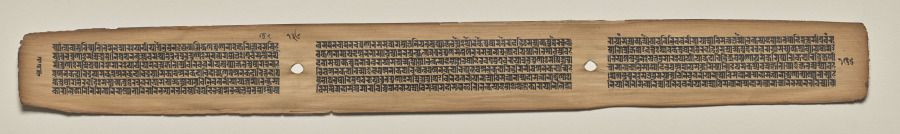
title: Text, Folio 136 (verso), from a Manuscript of the Perfection of Wisdom in Eight Thousand Lines (Ashtasahasrika Prajnaparamita-sutra)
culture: Eastern India, Bihar, Vikramashila Monastery. Painting: Nepal, Kathmandu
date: Sunday, September 14, 1119 (year 239 of the Newar Samvat in the month of Ashvina)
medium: gum tempera and ink on palm leaves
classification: Painting